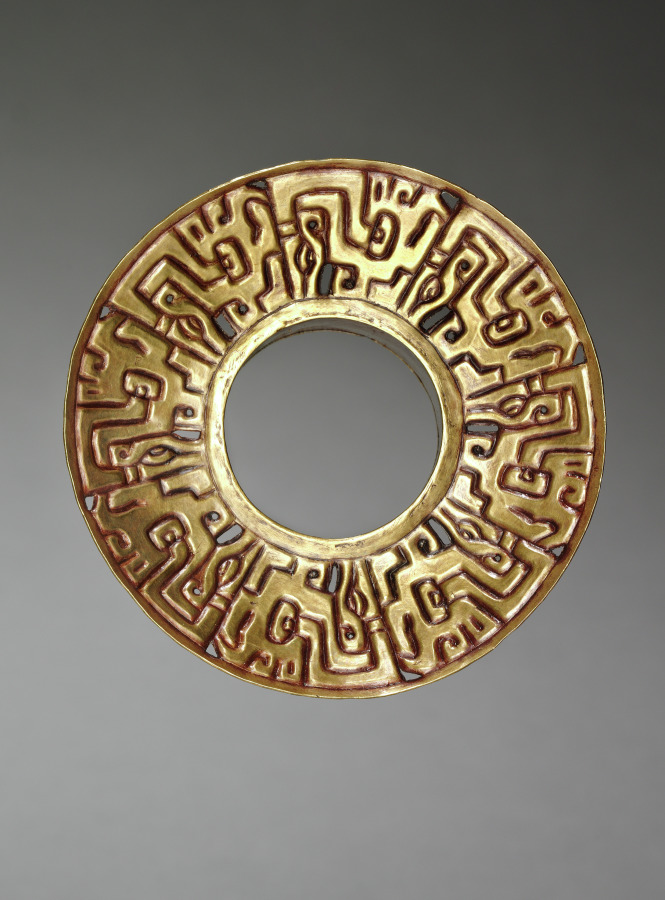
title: Ear Ornament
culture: Peru, North Highlands, Chavín de Huantar(?), Chavín style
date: c. 500–200 BCE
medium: hammered and cut gold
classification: Metalwork